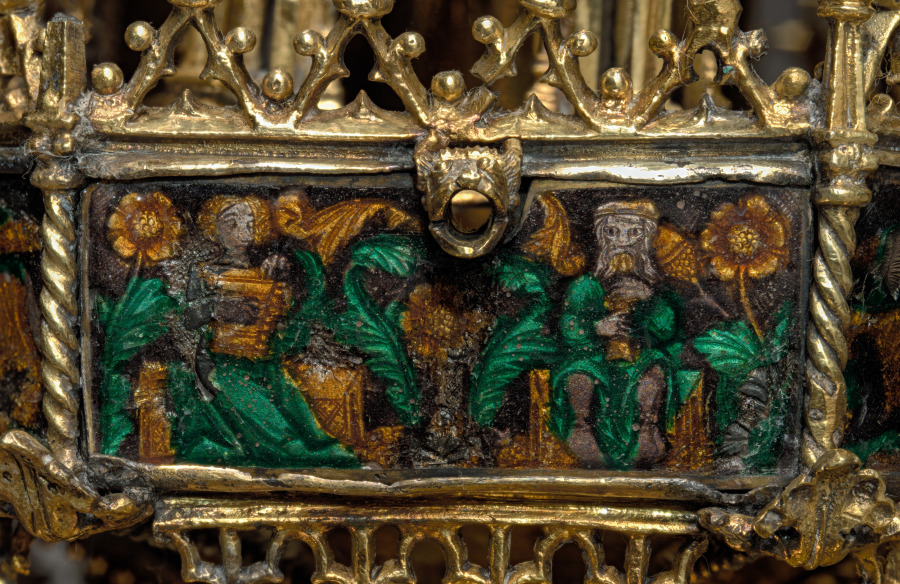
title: Table Fountain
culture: France, Paris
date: c. 1320–40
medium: gilt-silver and translucent enamels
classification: Metalwork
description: Conceptually and stylistically, this object is beyond all else a piece of Gothic architecture in miniature with vaults, pinnacles, columns, and traceried arches. Though the artist who created it is unknown, he was unquestionably inspired by the great Gothic buildings of his time. The table fountain is a three-tiered assembly combining cast elements with bent sheets of gilt-silver. To these have been attached a series of enamel plaques representing grotesque figures, some of which play musical instruments. Water wheels and bells were added to capture motion and sound. The rich detail, precious materials, and involved ornamentation of this deluxe object suggest it would have been expensive to produce and highly treasured by its original owner, someone of high status, and would have been deployed as an object of spectacle. This is the most complete example of its type known to survive from the Middle Ages. Medieval inventories reveal that small fountains like this, often taking various forms, and generally made from precious metals, once existed in large numbers, thus making the Cleveland table fountain an extremely rare object.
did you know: This fountain with its minute architectural details and finely made enamel plaques displayed the wealth and refinement of the owner as it entertained his guests. Imagine hearing the ringing of the tiny bells when this fountain was in use.